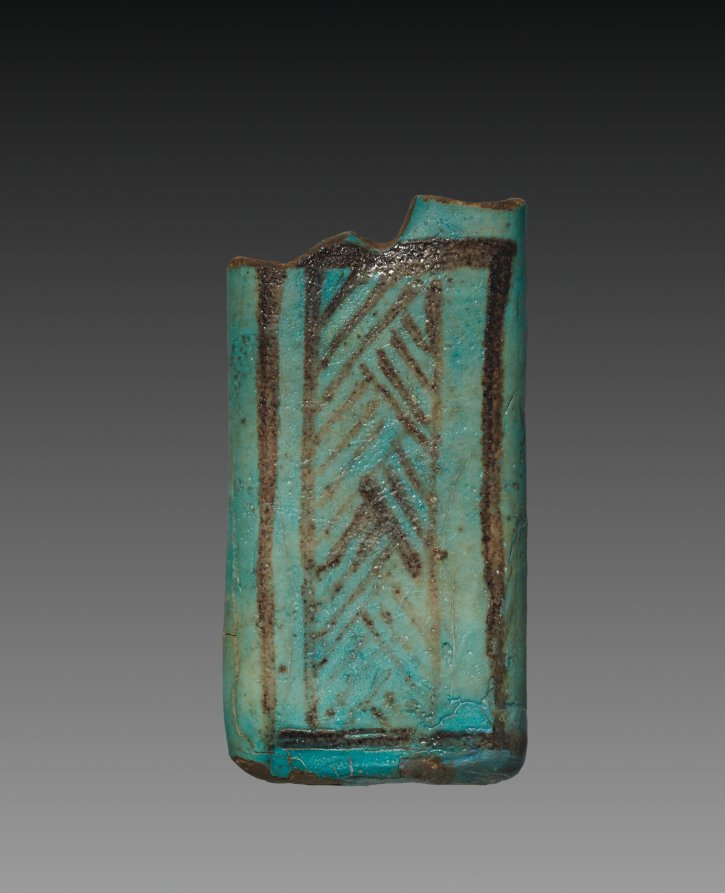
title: Kohl Container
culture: Egypt, New Kingdom (1540–1069 BCE), Dynasty 19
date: 1295–1188 BCE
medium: turquoise faience with black painted decoration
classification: Cosmetic Objects